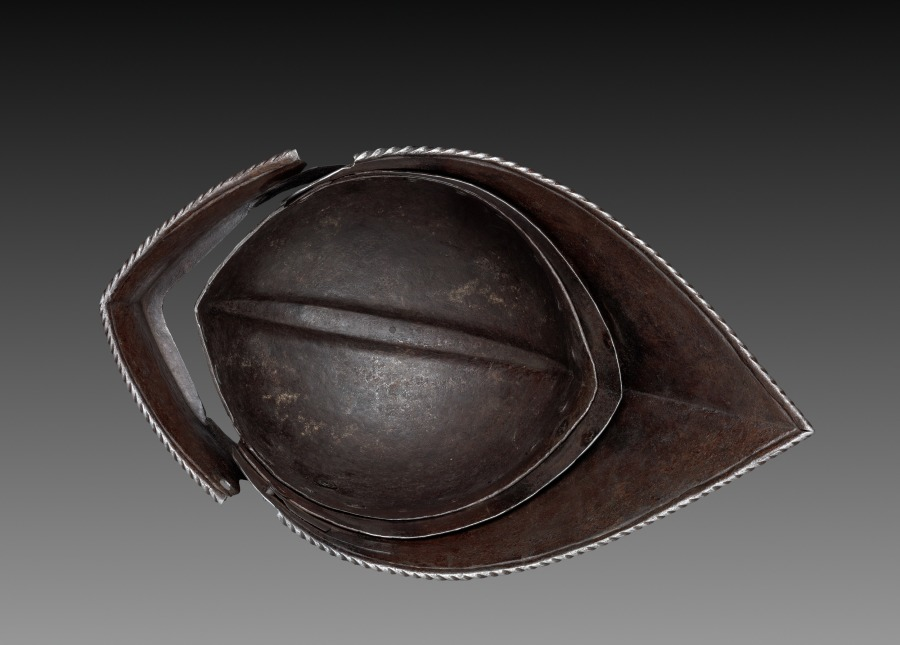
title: Visored Sallet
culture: Germany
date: c. 1490–1500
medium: steel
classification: Arms and Armor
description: The sallet is a partly open-face helmet common in Europe during the 1400s, used in both equestrian and infantry versions. Sallets with movable visors, like this example, are considered to be more technically and visually interesting; beautifully streamlined, it assumes a highly sculptural teardrop shape. Originally it would have been part of a complete suit of armor. The sallet became the quintessential helmet form of the late Middle Ages and is frequently represented in medieval miniatures and woodcuts.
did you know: Medieval sallets were design inspiration for modern-day fireman's helmets.